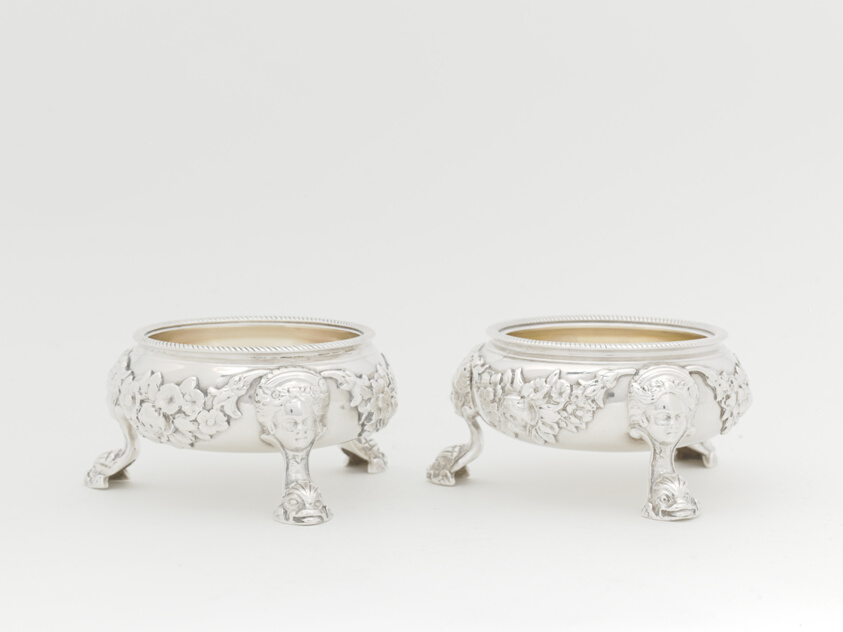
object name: Decorative Arts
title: Pair of Salt Dishes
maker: David Hennell; English, 1712–1785; London, England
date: 1751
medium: Silver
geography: London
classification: saltcellar; silver; american decorative arts; american arts; decorative arts